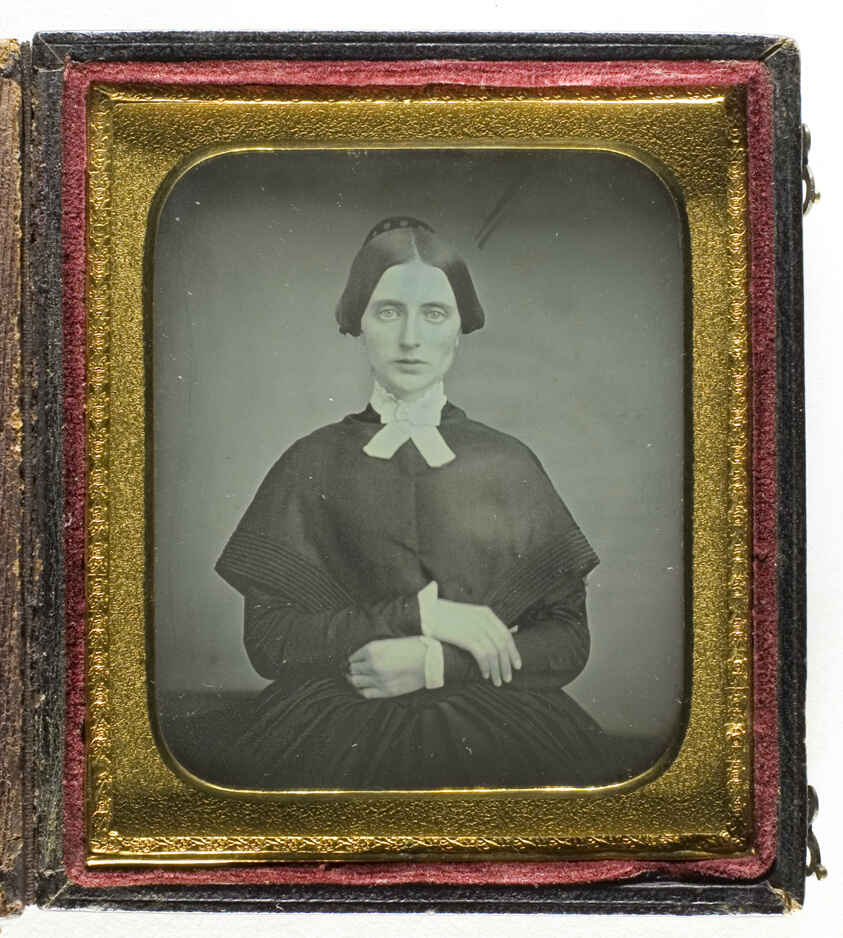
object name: Photograph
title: Untitled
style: 19th century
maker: Artist unknown; Probably American, 19th century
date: c. 1850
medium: Daguerreotype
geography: United States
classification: daguerreotype; photographic process; photography; photograph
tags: Collected by Hugh Edwards